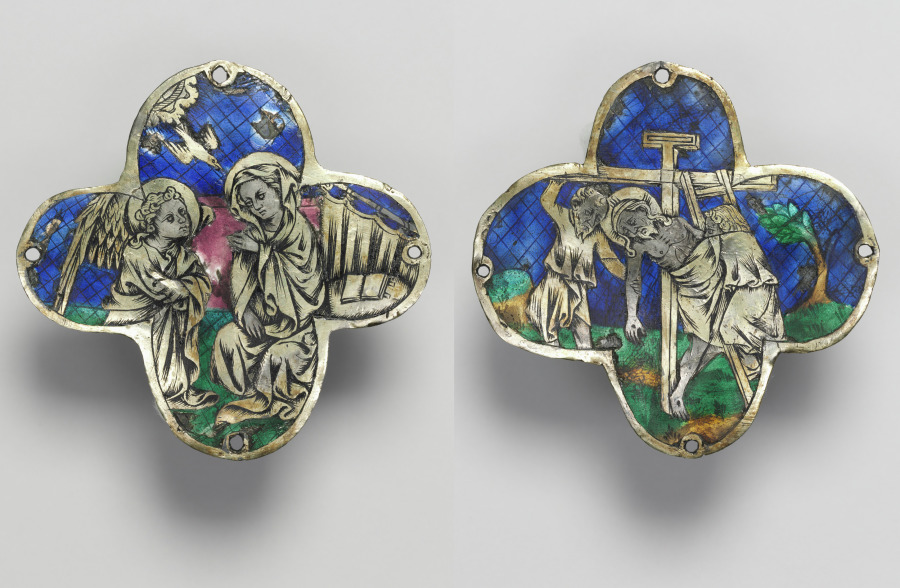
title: Quatrilobed Plaque (pair): The Annunciation and The Descent from the Cross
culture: Spain, Catalonia?, 14th century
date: c. 1350–1400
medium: translucent enamel (basse-taille) on silver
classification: Enamel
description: These plaques were probably originally placed at the end of the arms of a processional cross. They are decorated in an enameling technique called basse-taille in which colorful translucent enamel pastes are fused over an engraved and chased silver plaque.